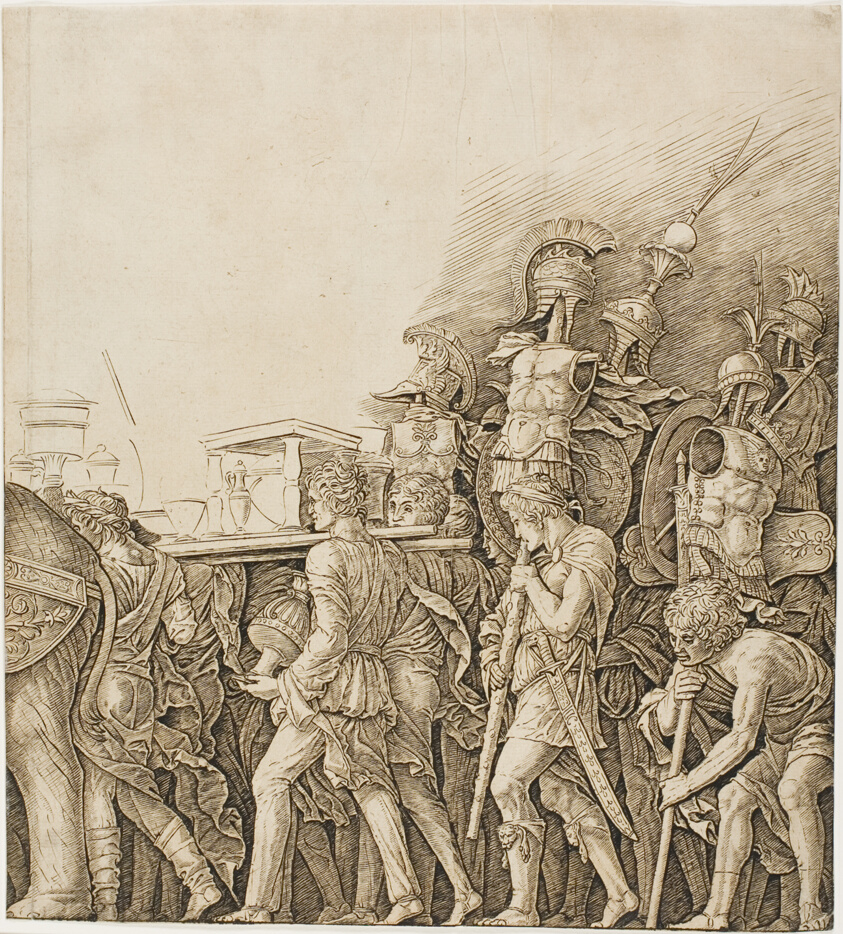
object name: Print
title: Triumph of Caesar: Soldiers Carrying Trophies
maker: Workshop of Andrea Mantegna; Italian, 1431-1506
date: c. 1495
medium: Engraving on paper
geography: Italy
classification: engraving; print; prints and drawing